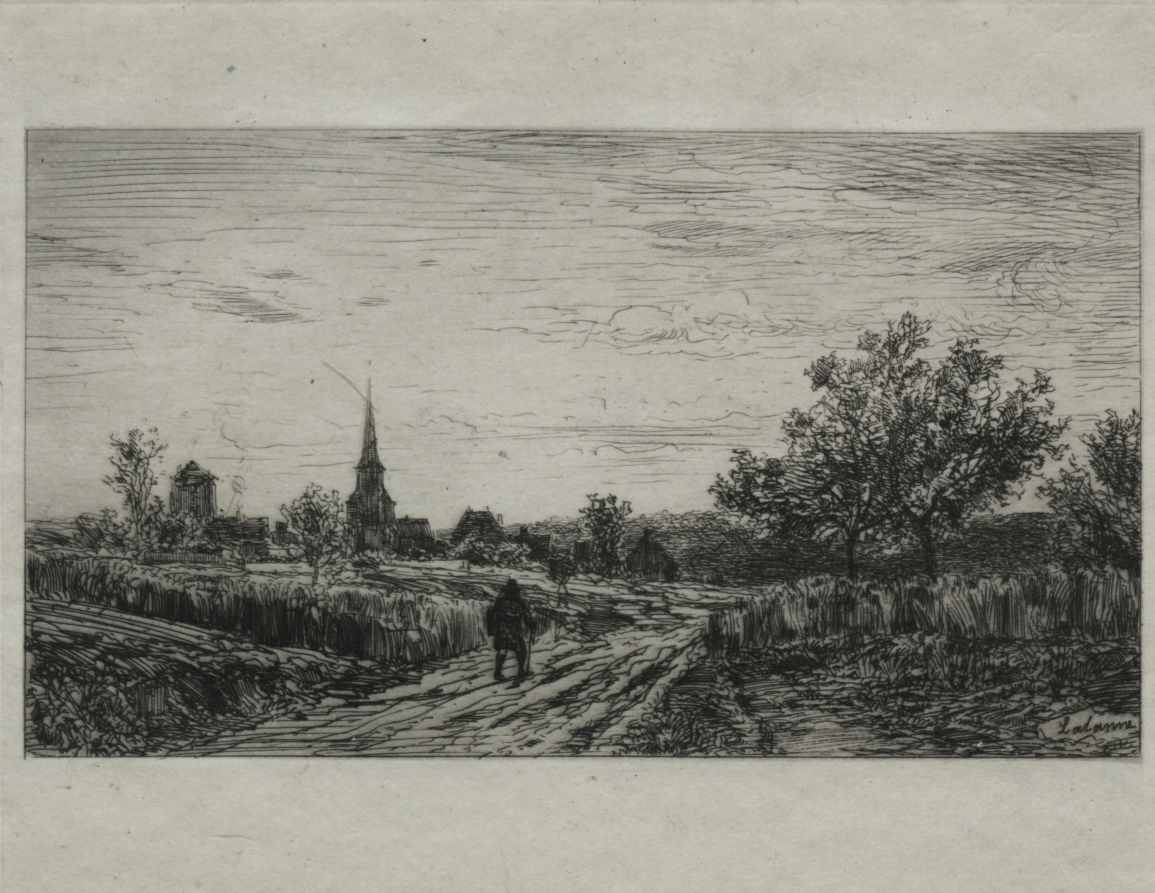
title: Landscape, Evening (Returning Home)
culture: France, 19th century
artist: Maxime Lalanne (French, 1827–1886)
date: 1866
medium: etching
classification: Print